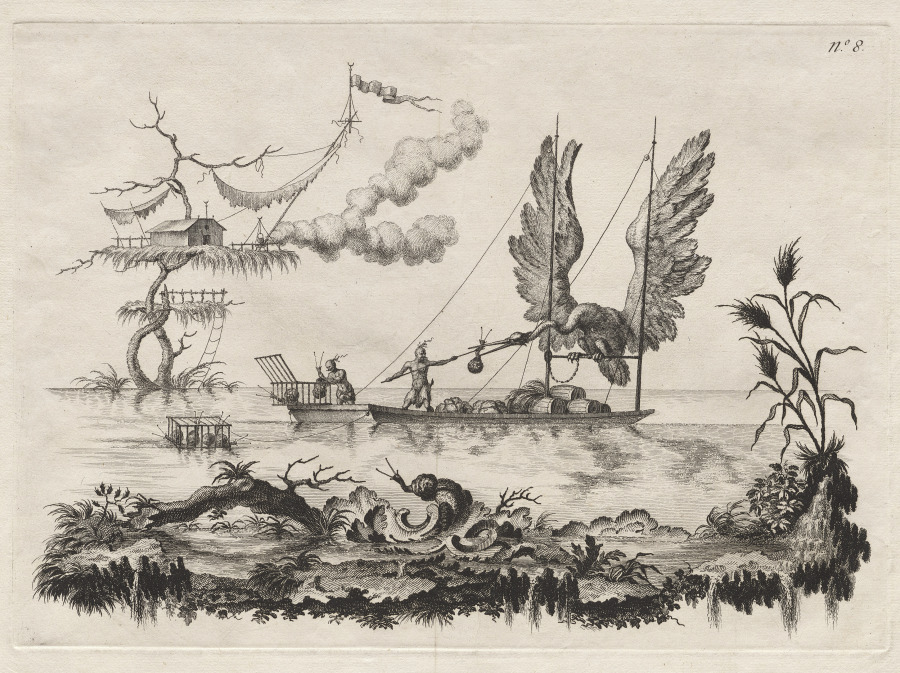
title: A Boat That Has for Sails the Wings of a Huge Bird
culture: Italy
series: Suite of the Most Notable Things Seen by John Wilkins Erudite English Bishop during His Famous Voyage from the Earth to the Moon … dedicated to Sir William Hamilton ambassador to the Court of Naples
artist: Filippo Morghen (Italian, 1730–after 1807)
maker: possibly after Jean-Pierre-Louis-Laurent Hoüel (French, 1735–1813)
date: about 1769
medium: etching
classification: Print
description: Filippo Morghen’s set of 10 etchings is outstanding among visual narratives of imaginary voyages to the moon, both visual and literary, that intrigued 18th-century European audiences. A title page and nine plates depict the imagined lives and economy of moon dwellers. These include modes of transport such as large birds and sailboats propelled by giant bellows, enormous scissors for capturing wild beasts (including an oversized rat), and the use of giant pumpkins as fishing boats and as dwellings. Representations of the moon dwellers are based on inaccurate and imaginary European interpretations of Asian, Ottoman, and Native American cultures—called chinoiserie and turquerie—that permeated the decorative and visual arts of the period.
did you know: Morghen based this print series on three books dedicated to moon exploration, including Bishop Francis Godwin’s, Man in the Moone, 1640.